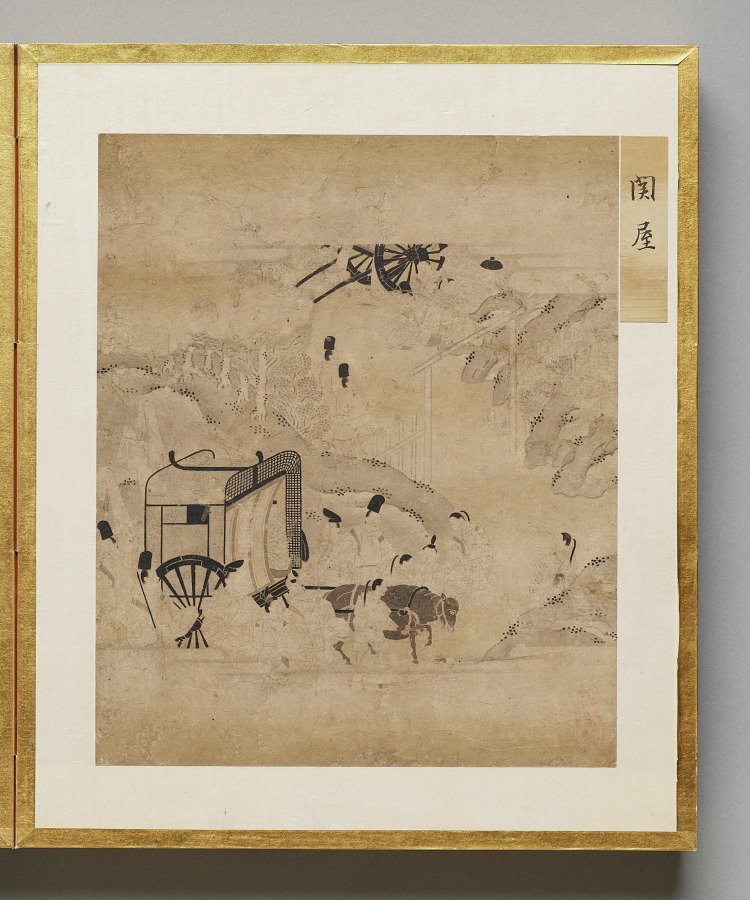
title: Gatehouse from Album of Illustrations for the Tale of Genji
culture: Japan, Edo period (1615–1868)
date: 1600s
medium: painting in an accordion-style album; ink, light color, and gold on paper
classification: Bound Volume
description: This album contains illustrations for the classic literary work the Tale of Genji, authored in the 1000s by Murasaki Shikibu, an aristocrat of the Heian period (794–1185) court. The scenes are painted in the “white drawing” (hakubyō) mode, in which a fine ink line is used to depict figures and spaces with great subtlety, punctuated only occasionally by traces of red pigment for a character’s lips, a detail of a garment, or a decorative element. These two scenes illustrate episodes from the chapters “Thin Veil of Cloud” (Usugumo) and “Barrier Gate” (Sekiya).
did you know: The illustrations are identified by chapter title in cartouches to the upper right of the paintings.